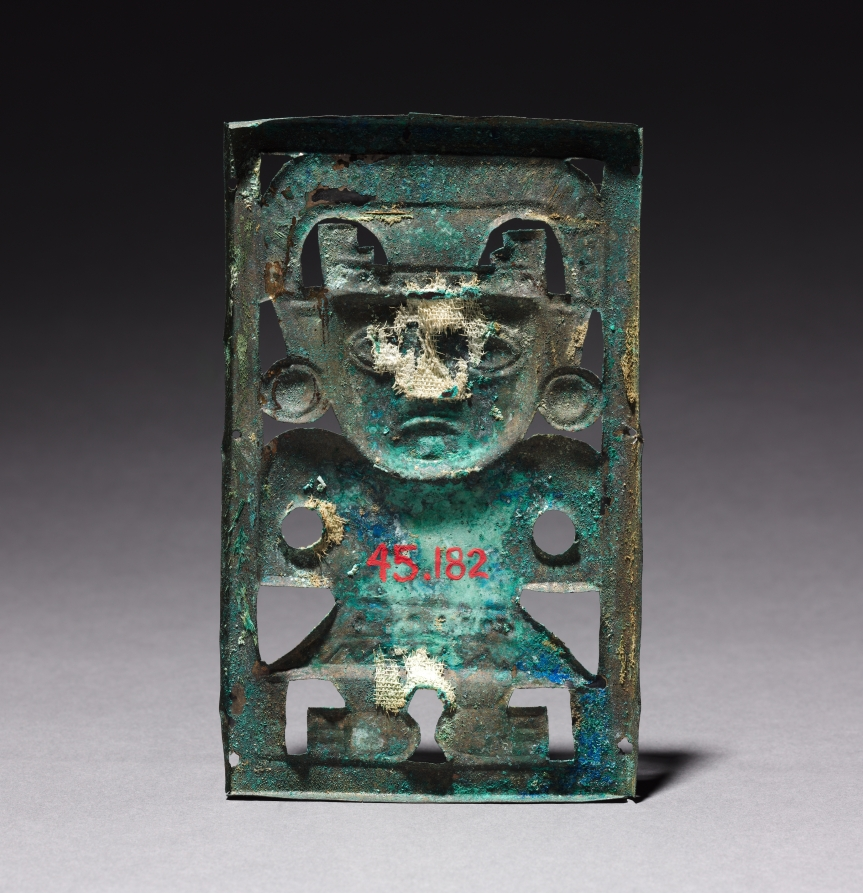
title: Plaque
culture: Peru, North Coast, late Chimú Culture, 14th-15th century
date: 1300s-1400s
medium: bronze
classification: Metalwork